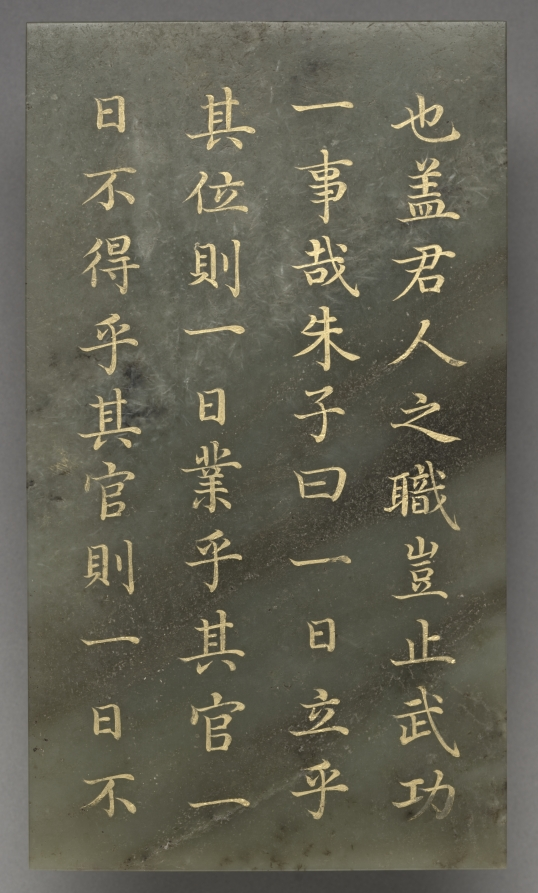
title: Tablet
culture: China, Qing dynasty (1644–1911), Qianlong reign (1736–95)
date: 1778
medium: jade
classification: Jade